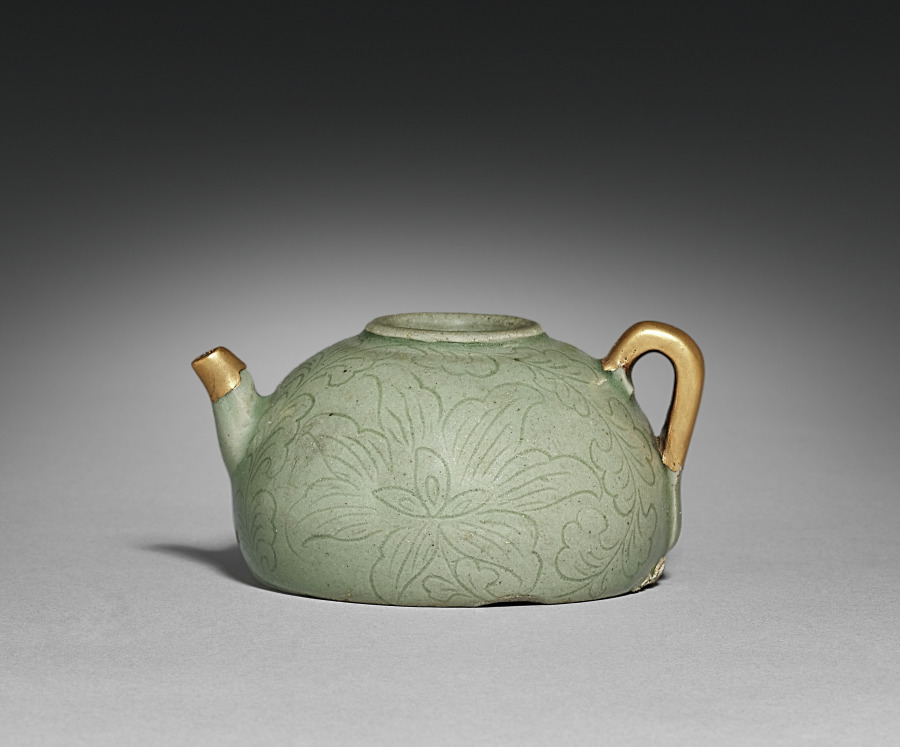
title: Wine Ewer with Incised Scroll Design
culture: Korea, Goryeo dynasty (918–1392)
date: 1100s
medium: celadon with incised and carved design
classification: Ceramic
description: Many celadon ceramics, such as these two miniature pots, have been repaired with gold lacquer. Termed kintsugi (literally meaning “gold joinery”) in Japanese, this restoration method highlights broken parts with glittering gold mixed with lacquer. Initiated in 15th-century Japan, the technique follows a popular aesthetic concept called wabi-sabi, which finds beauty in imperfect things. Goryeo celadons were considered rare treasures among early 20th-century Japanese collectors; thus, their broken condition is brilliantly highlighted in gold lacquer, as seen here in the repaired spouts, handle, and lid.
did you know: Termed kintsugi (literally meaning “gold joinery”) in Japanese, this method of repairing broken parts with glittering gold mixed with lacquer was extensively used for ceramic works in the Goryeo period, such as this one.